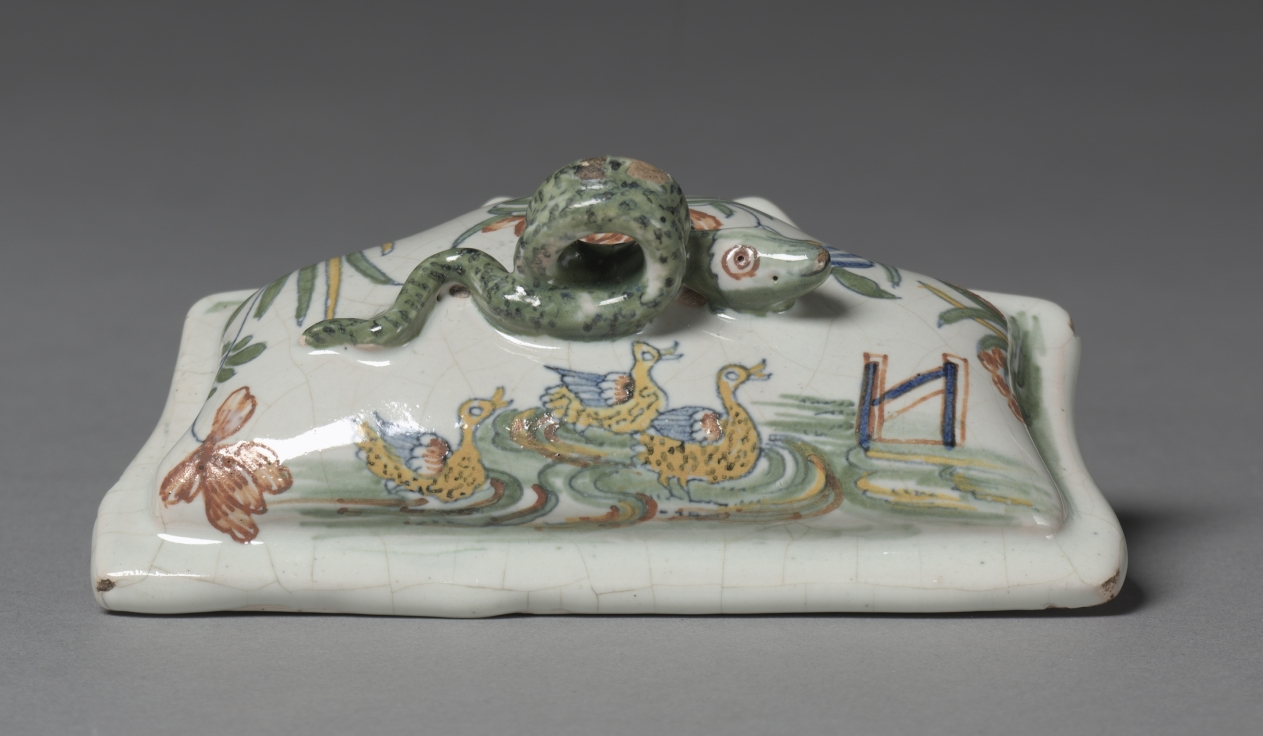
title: Writing Stand with Inkwells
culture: France, Sinceny, 18th century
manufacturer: Sinceny Factory (French)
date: 1746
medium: Tin-glazed earthenware (faience) with enamel decoration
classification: Ceramic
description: The faience factory at Sinceny was an offshoot of that at Rouen. In style, Sinceny closely resembles later Rouen wares with polychrome decoration. The stylized flowers and insects which decorate this writing stand are entirely typical of Sinceny faience.